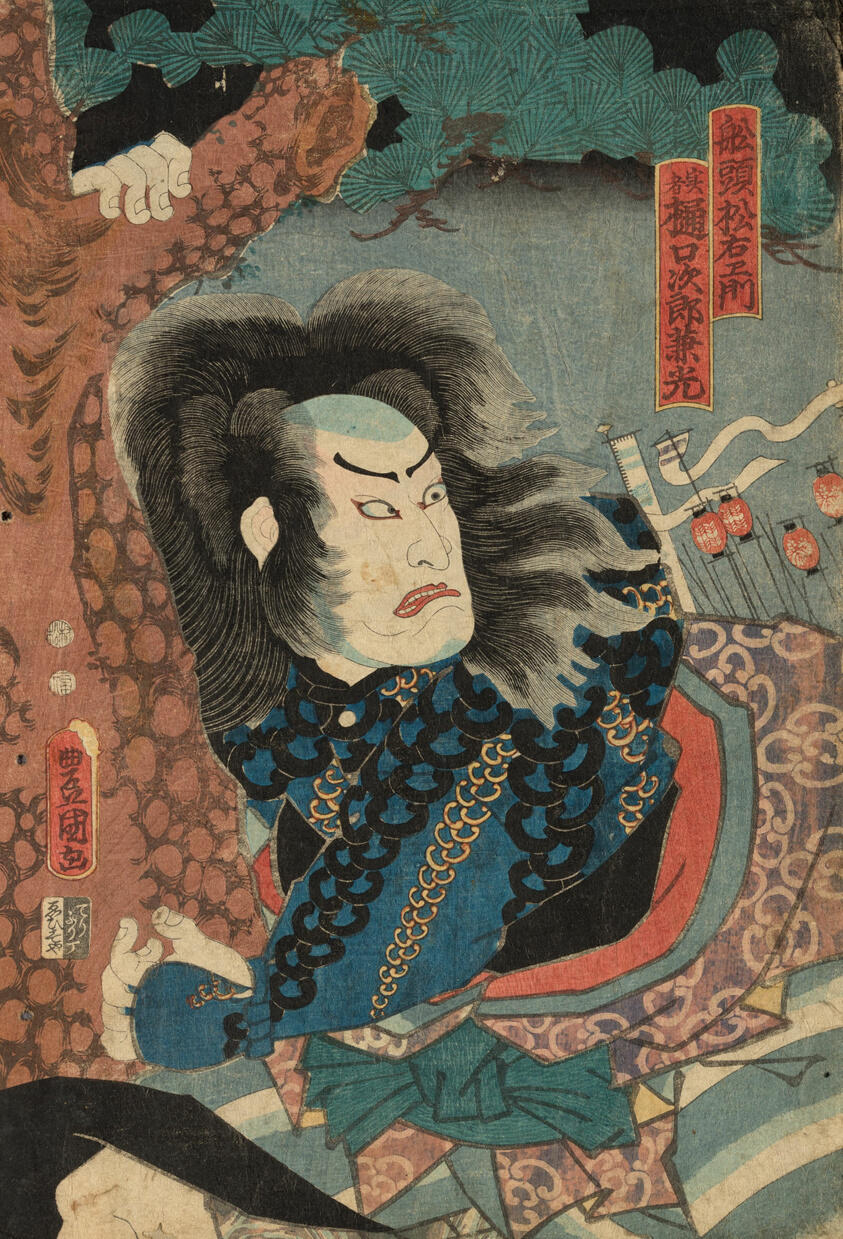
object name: Print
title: Actor Nakamura Utaemon IV as the Boatman Matsuemon, actually Higuchi Jiro Kanemitsu (Sendo Matsuemon, jissha Higuchi Jiro Kanemitsu)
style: Japanese (culture or style)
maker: Utagawa Kunisada I (Toyokuni III) (Japanese, 1786–1864)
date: 1849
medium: Color woodblock print; oban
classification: woodblock print; print